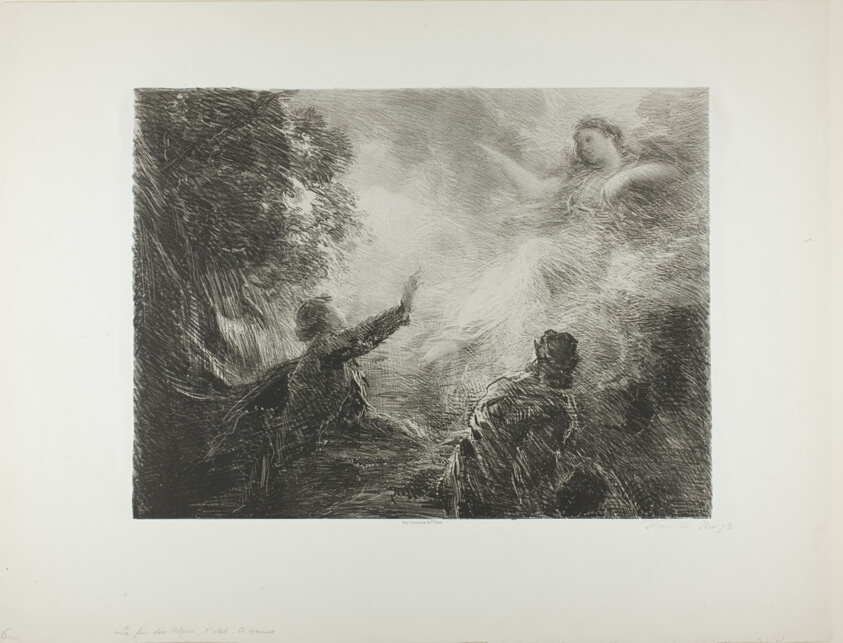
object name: Print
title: The Fairy of the Alps, first plate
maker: Henri Fantin-Latour (French, 1836-1904)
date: 1873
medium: Lithograph in black on light gray China paper laid down on white wove paper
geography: France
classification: lithograph; print; prints and drawing